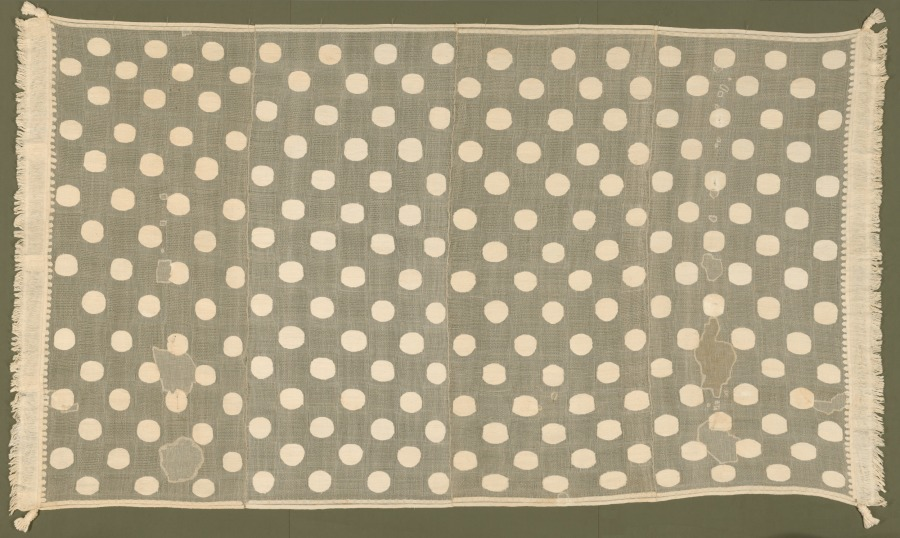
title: Peruvian Textiles: Mantle or Hanging, Loincloth, Turban, Padded Hat, Band with Tassels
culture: Peru, North Coast, Chimú style, 1200-1460s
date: 1405–1640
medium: cotton; plain weave, brocaded and complex alternating gauze with 3 or 5 shots of plain weave between gauze shots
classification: Textile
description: Although these textiles are similar in appearance and technical features, it is not clear that they were found or used together. They are said to come from the region of Chan Chan, the capital of the Chimú Empire. To see the record for each, click “see all set records,” above.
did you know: The Chimú forged an empire that thrived until the 1460s, when the Inka incorporated it into their own imperial domain.